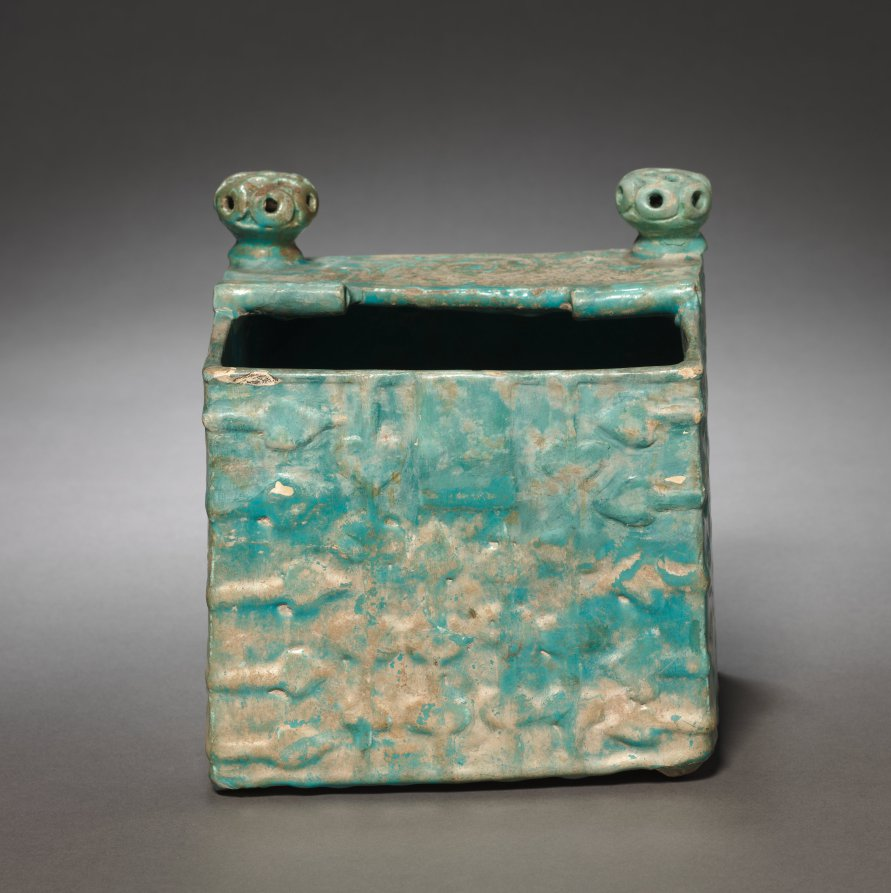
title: Casket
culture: Syria (Raqqa), Ayyubid Period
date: late 1100s–1200s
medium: fritware with molded design under glaze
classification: Ceramic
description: This square fritware box originally had a with hinged top. It is covered on the inside and outside with opaque turquoise glaze. The top back corners of the casket are surmounted by small openwork knobs. The casket would have rested on four feet, which have been lost. This is a ceramic imitation of a wooden box with metal fittings. The relief ornament imitates metal straps and a lock fitting.